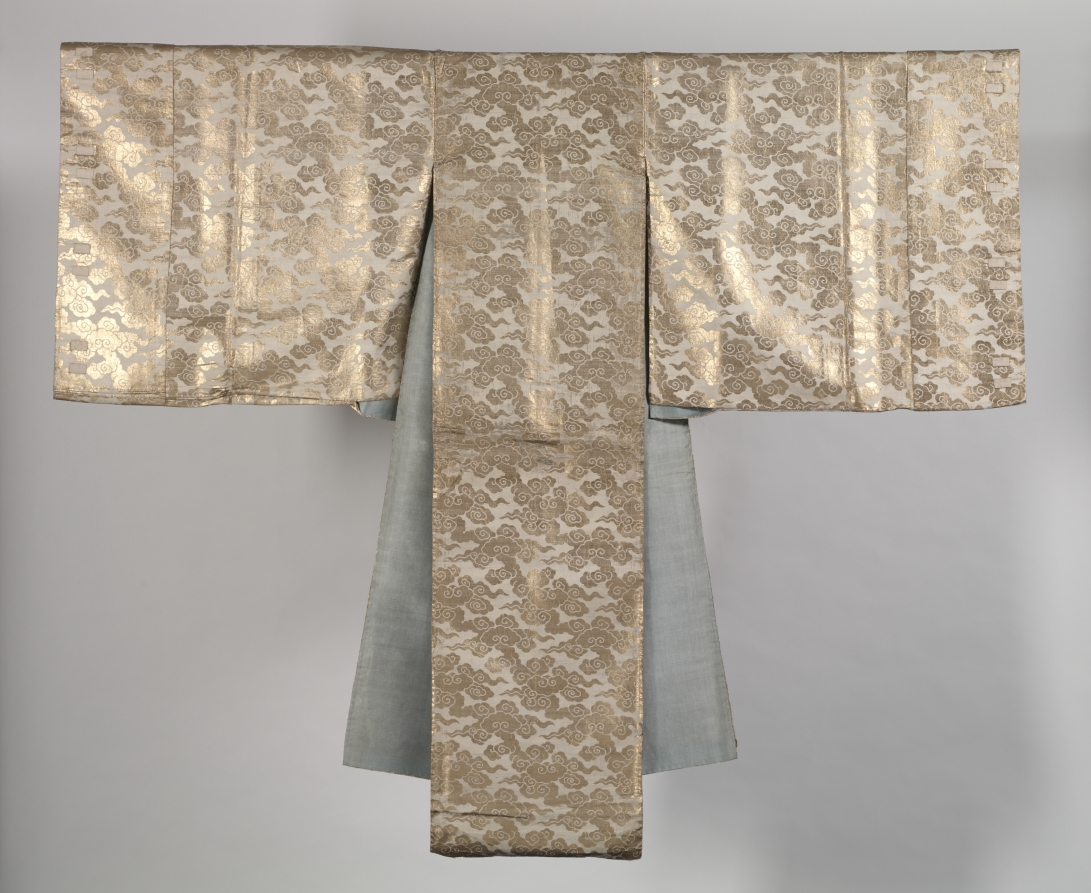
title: Noh Costume (Kariginu)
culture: Japan, Edo period (1615–1868)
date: 1800–1850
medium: silk, compound weave; metal thread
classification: Garment